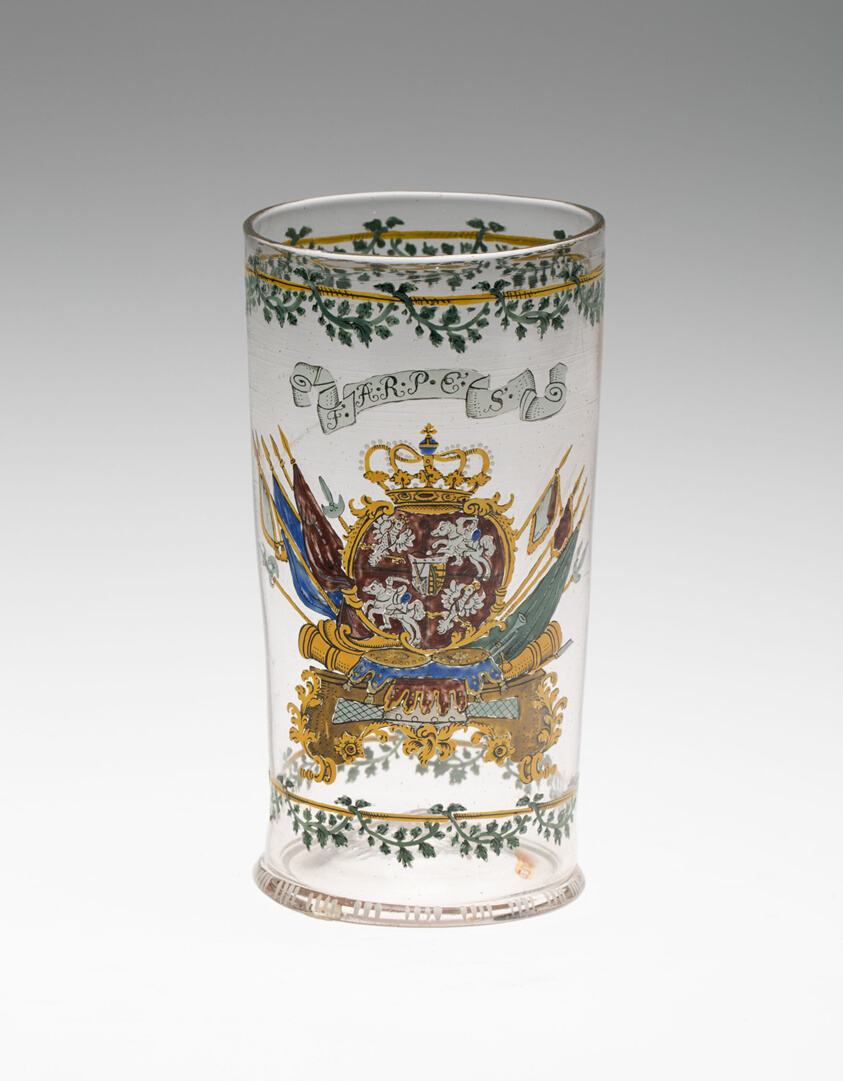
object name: Glass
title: Beaker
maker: Saxony, Germany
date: 19th century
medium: Glass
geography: Saxony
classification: drinking vessel; glass; european decorative arts